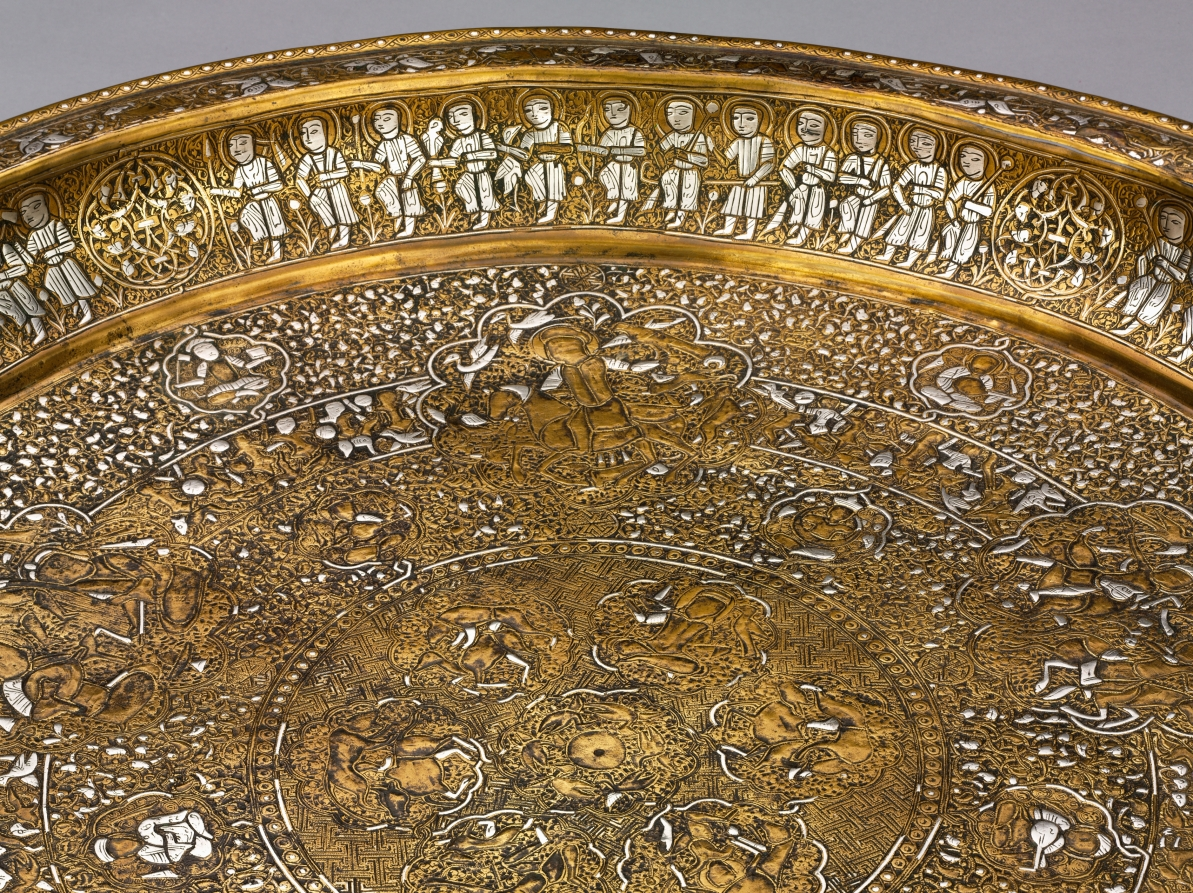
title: Tray Portraying Courtly Pleasures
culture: Syria, Ayyubid period (1171–1260)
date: 1240s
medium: sheet brass inlaid with silver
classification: Metalwork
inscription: The presence of ligatures in the narrow circular bands with interconnected human and animal figures suggests this may be a degenerate form of animated script. It is indecipherable.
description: This tray features images of courtly life interspersed with astronomical symbols. The scenes contained within large multilobed medallions display an enthroned prince with lions at his feet, a banquet, a hunt, dancers, and musicians. Contained within the concentric circles there are also references to solar and lunar motifs, including figures holding sunbursts and lunar crescents. This tray is made of a single sheet of brass and the silver inlay, which is best preserved on the tray’s inner curve, suggests its original brilliance.